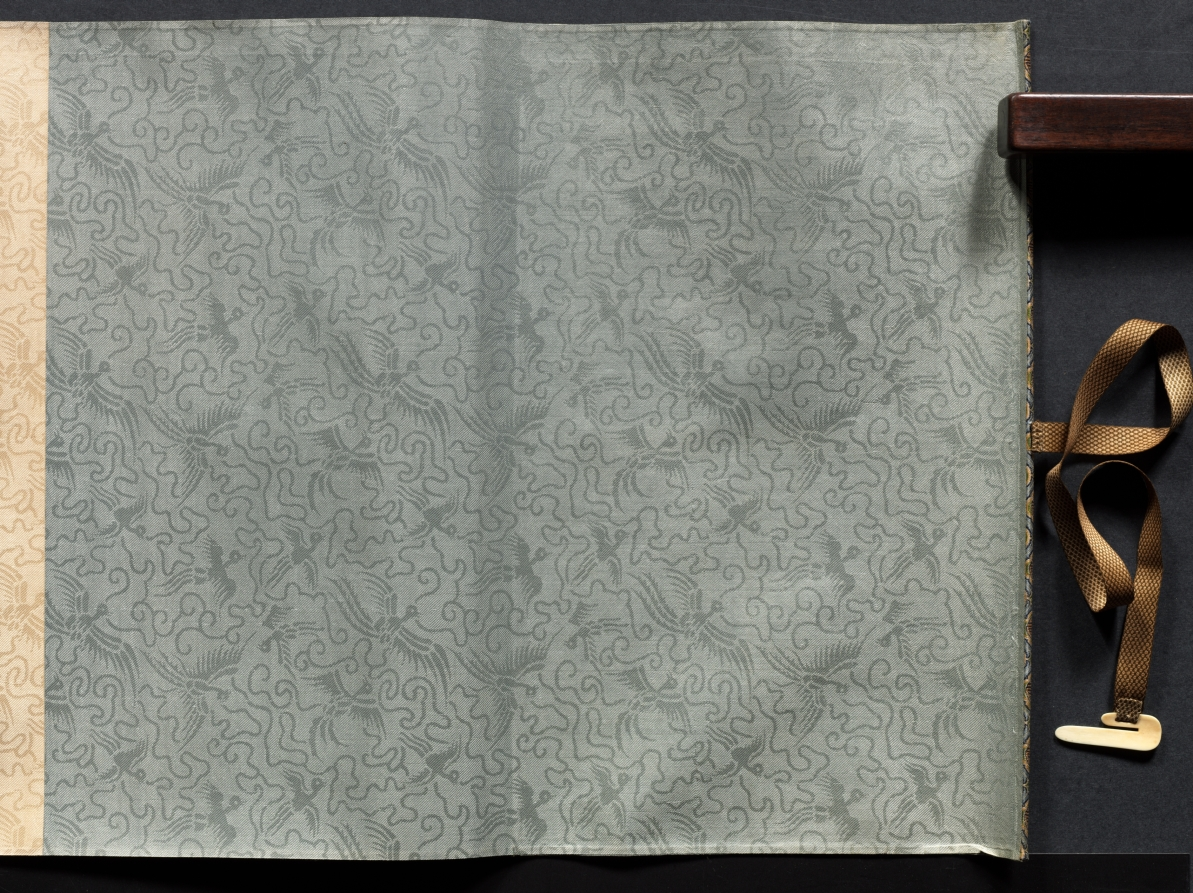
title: Ten Thousand Li of the Yangzi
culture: China, Ming dynasty (1368–1644)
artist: Dai Jin (Chinese, 1388–1462)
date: c. 1400s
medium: Handscroll; ink and color on paper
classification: Painting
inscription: Two colophons at end. Artist's seals: Dai Jin 戴進 and Wenjin 文進.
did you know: Dai Jin is traditionally considered the founder of the Zhe School, a style of landscape painting.